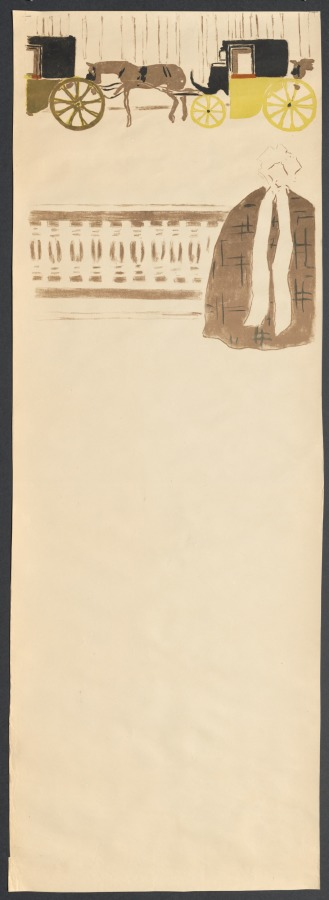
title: Nursemaids’ Promenade, Frieze of Carriages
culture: France, 19th century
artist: Pierre Bonnard (French, 1867–1947)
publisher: Molines, Galeries Lafayette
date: 1895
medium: color lithographs on wove paper, screen with four panels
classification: Print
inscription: signed on 2008.31.c, lower right, on stone: PB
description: This charming scene of a nanny and her three charges extends across four panels meant to be mounted as a folding screen. Pierre Bonnard emulated the solidly colored flat forms of Japanese color woodcut prints, which he collected. He featured the screen in his first solo exhibition at Paris's prestigious Galeries Durand-Ruel in 1896.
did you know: Although this screen was issued in an edition of 110, only about 20 copies survive today.